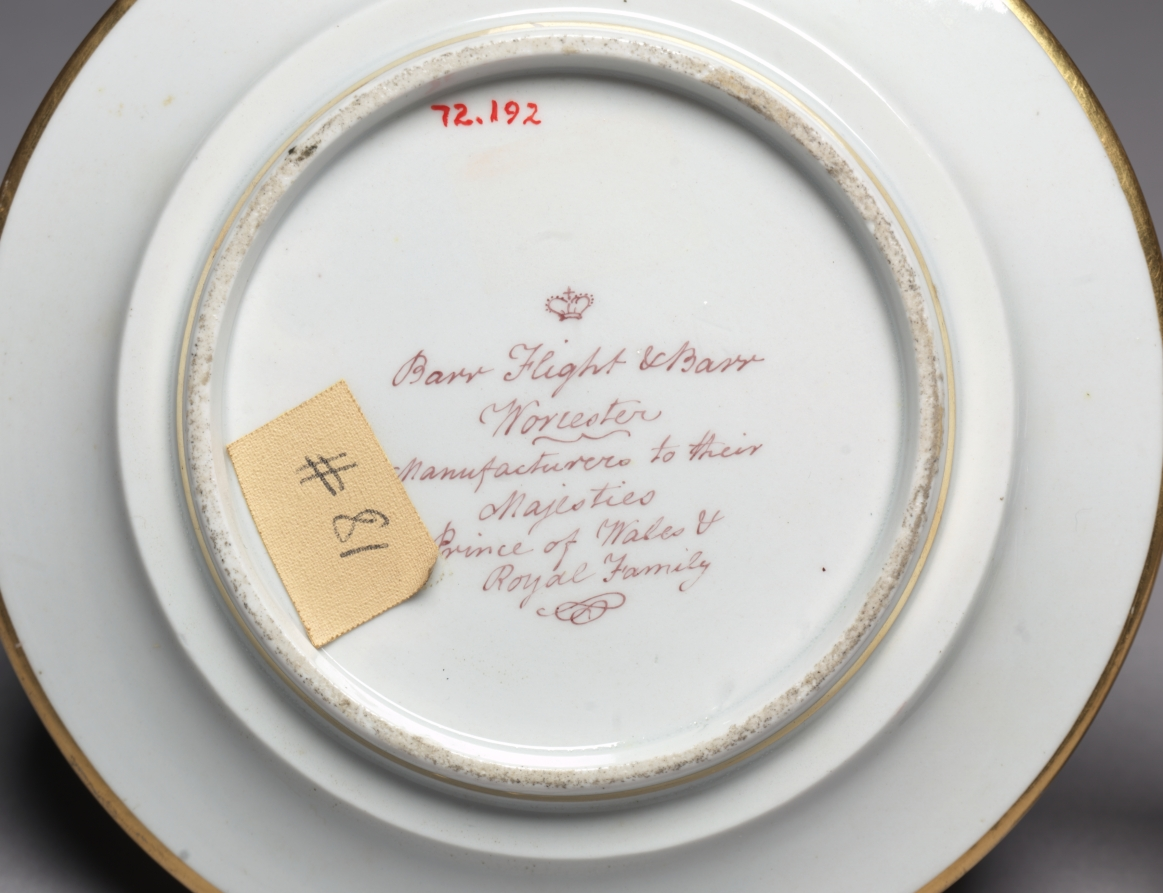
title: Dish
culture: England, Worcester, early 19th Century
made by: Worcester Porcelain Factory (British, established 1751)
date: c. 1810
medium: soft-paste porcelain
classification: Ceramic